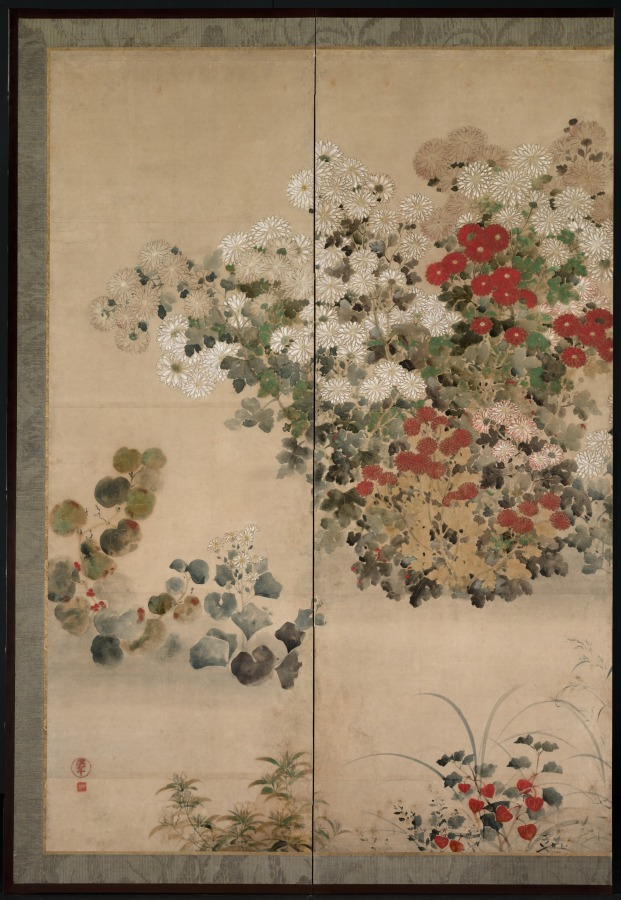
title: Flowers and Grasses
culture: Japan, Edo period (1615–1868)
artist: Kitagawa Sōsetsu (Japanese, active 1639–50)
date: mid-1600s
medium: pair of six-fold screens, ink and color on paper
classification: Painting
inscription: two seals, lower left: "I-nen; Sosetsu"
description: Kitagawa Sōsetsu painted for the Maeda family, powerful rulers of what is present-day Ishikawa Prefecture on the central northern coast of Honshū, Japan’s main island. Screens served as room dividers and backdrops in Maeda grand residences. This composition is considered one of the artist’s masterpieces. Kitagawa Sōsetsu is thought to have been a student of Tawaraya Sōsetsu, who was in turn the student of Tawaraya Sōtatsu, the Kyoto-based master painter regarded as the creator of the style that came to be known as Rinpa. By selecting a painter of this lineage, the Maeda family consciously connected their aesthetics to those of the imperial capital as a means of proclaiming their elevated status.